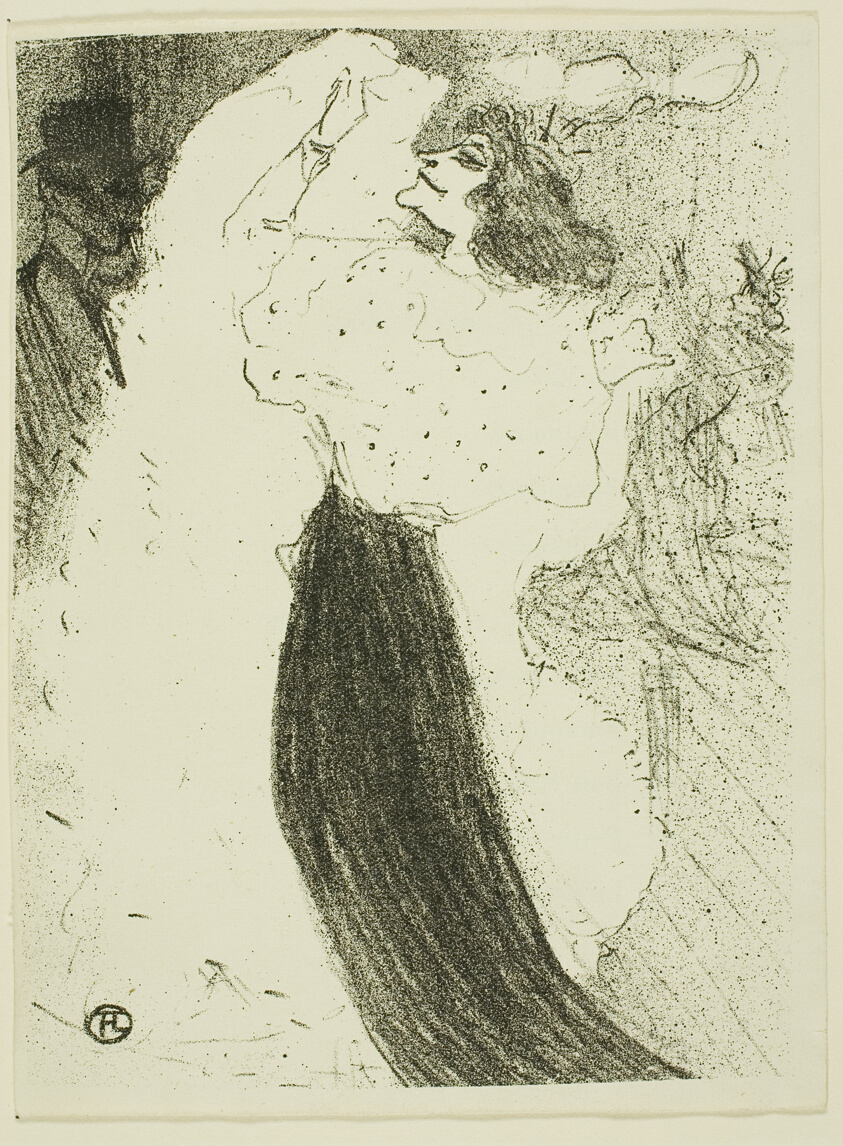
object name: Print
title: Eccentric Dance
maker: Henri de Toulouse-Lautrec (French, 1864-1901)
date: 1894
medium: Lithograph on ivory wove paper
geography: France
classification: lithograph; print; prints and drawing